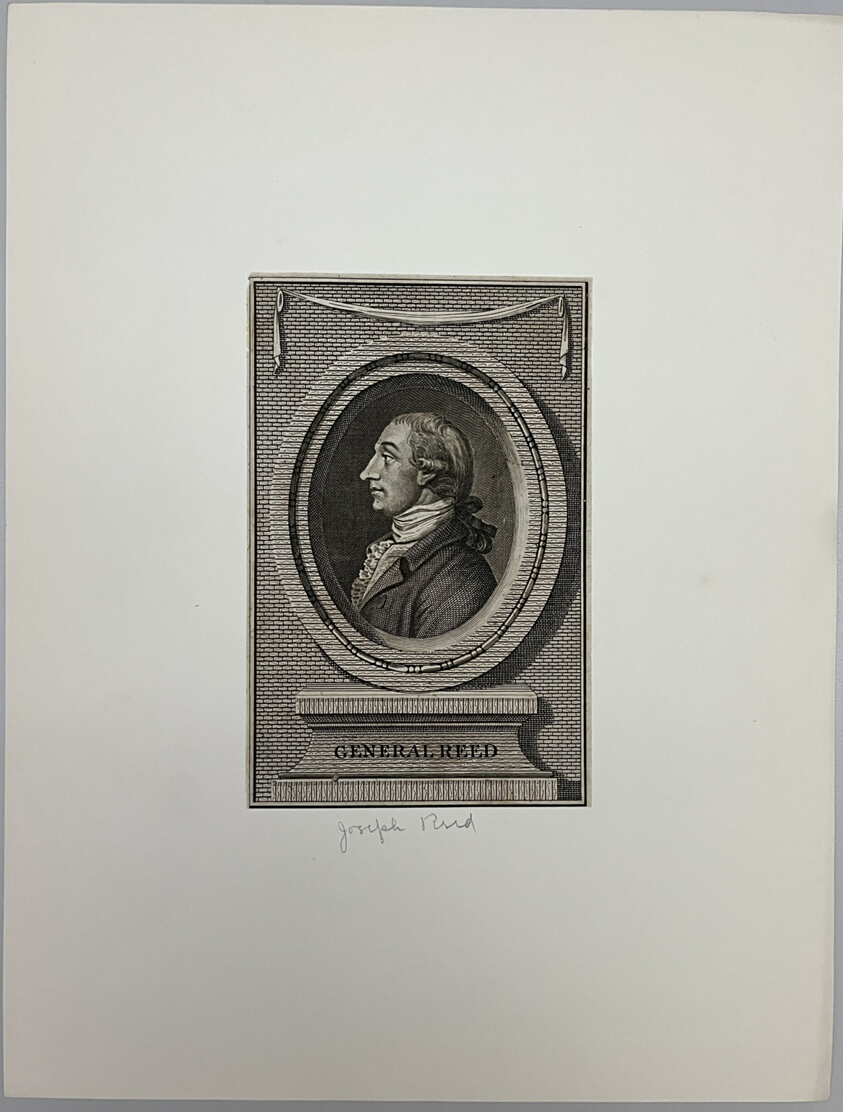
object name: Print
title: General Reed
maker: Artist Unknown (Likely American, 19th century)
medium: Etching on paper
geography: United States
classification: reproduction; print; prints and drawing